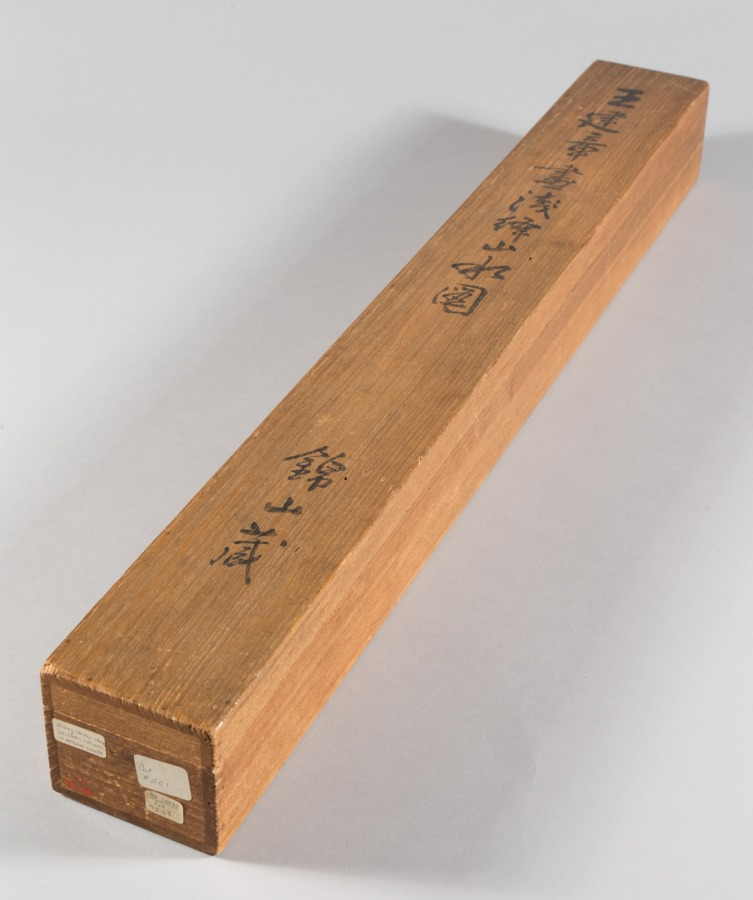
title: Solitary Colors of the Autumn Woods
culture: China, Ming dynasty (1368–1644)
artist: Wang Jianzhang (Chinese, active 1621–1662)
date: first half 1600s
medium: hanging scroll; ink and color on satin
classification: Painting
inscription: Artist's inscription, signature, and 2 seals: Cold frost falls on the fences,/ Solitary colors scatter the maples./ Reciting the chapter of "The Autumn Water,"/ I cannot still the emotion in my old heart. After the style of Fan Hua-yüan [Fan Kuan], Wang Chien-chang . [seals] Wang shih chih yin; Chien-chang. trans. LYSL/HK/WKH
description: Two gentlemen stand outside a thatched hut in a dense forest; some trees have bare branches indicating that the season is early autumn. Wang Jianzhang’s inscribed poem refers to a chapter called “Autumn Water” from Zhuangzi, a famous Daoist text written in the 3rd century BC: "Cold frost falls on the fences, / Solitary colors scatter the maples. / Reciting the chapter of “The Autumn Water,” / I cannot still the emotion in my old heart." Wang Jianzhang lived through the collapse of the Ming dynasty (1368–1644) and the rise of the Qing dynasty (1644–1911), when China was governed by the Manchus, an ethnic people from Manchuria who were traditionally viewed as “barbarians” by the Chinese. The poetic reference to Zhuangzi’s “Autumn Water” seems to discreetly convey Wang’s feelings about his country being taken over. “Autumn Water” was about learning to take steps in the foreign way, but not acquiring a foreign tongue. Perhaps Wang was lamenting his conflicted situation. For survival he had to adapt to the new political and social climate, while still trying to maintain his own identity and Chinese traditions.